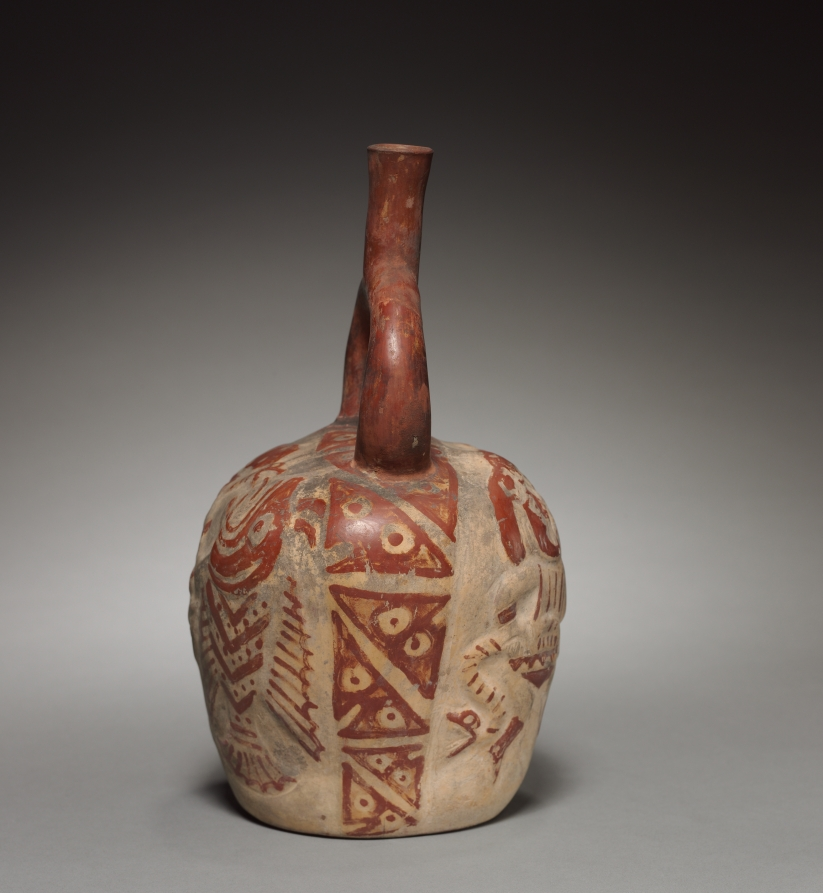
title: Bottle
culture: Peru, Chimú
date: c. 300–500 CE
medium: pottery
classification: Ceramic